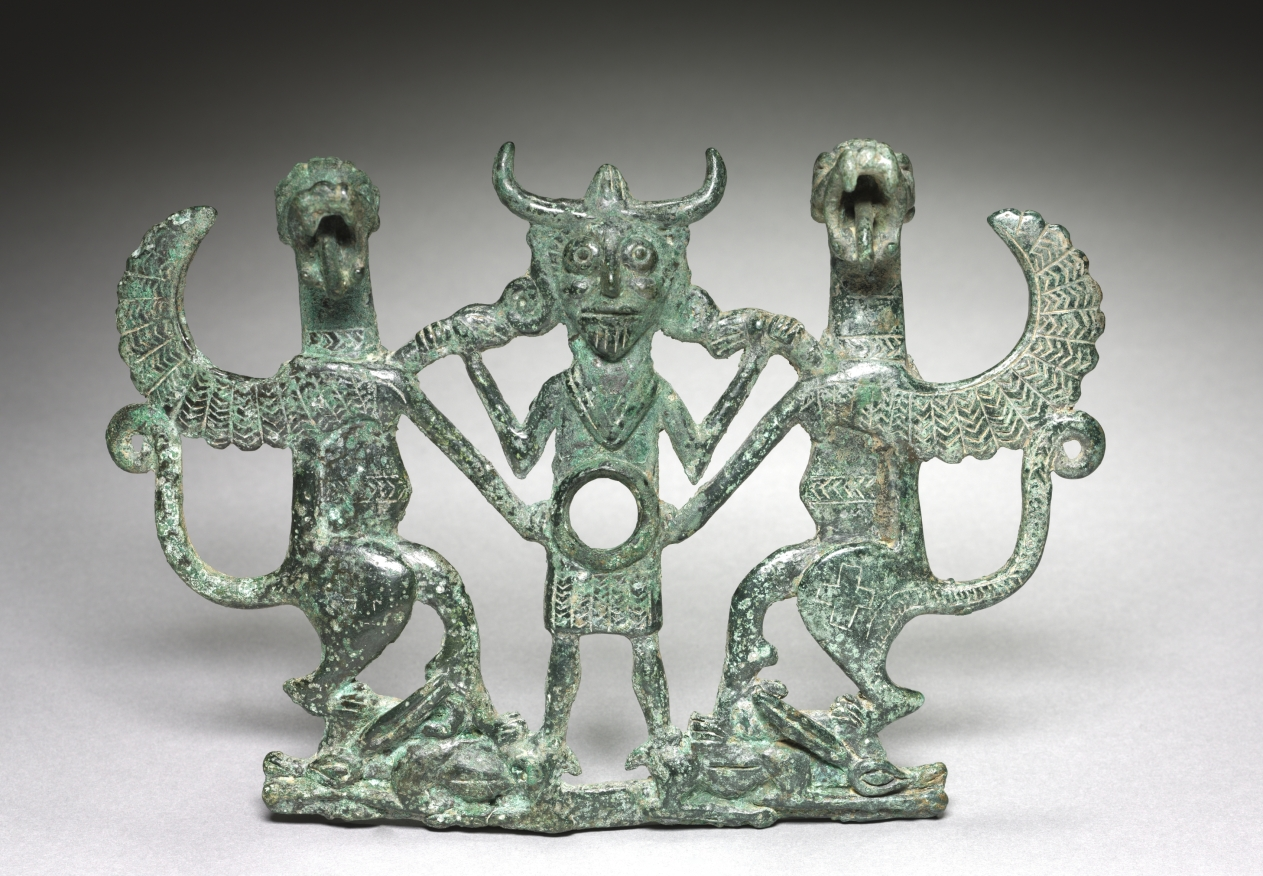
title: Master of Animals Cheekpiece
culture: Iran, Luristan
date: c. 700 BCE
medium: bronze, cast and incised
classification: Metalwork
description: In this cast bronze cheekpiece, a horned male figure with sidelocks grabs two winged felines by their forelegs. Each feline tramples a rabbit beneath its feet. This design is an ancient Near Eastern motif known as the Master of Animals. Incised chevrons, lines, and crosses decorate the master and the winged felines. A ring penetrating the male figure’s torso provides a means of attachment for a metal horse bit, now missing, and a second cheekpiece, likely nearly identical. This work likely originates from Luristan, a region in northwestern Iran known for its metalworking and horse-breeding in the Iron Age.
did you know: The Master of Animals may represent a god of nature or the hunt.